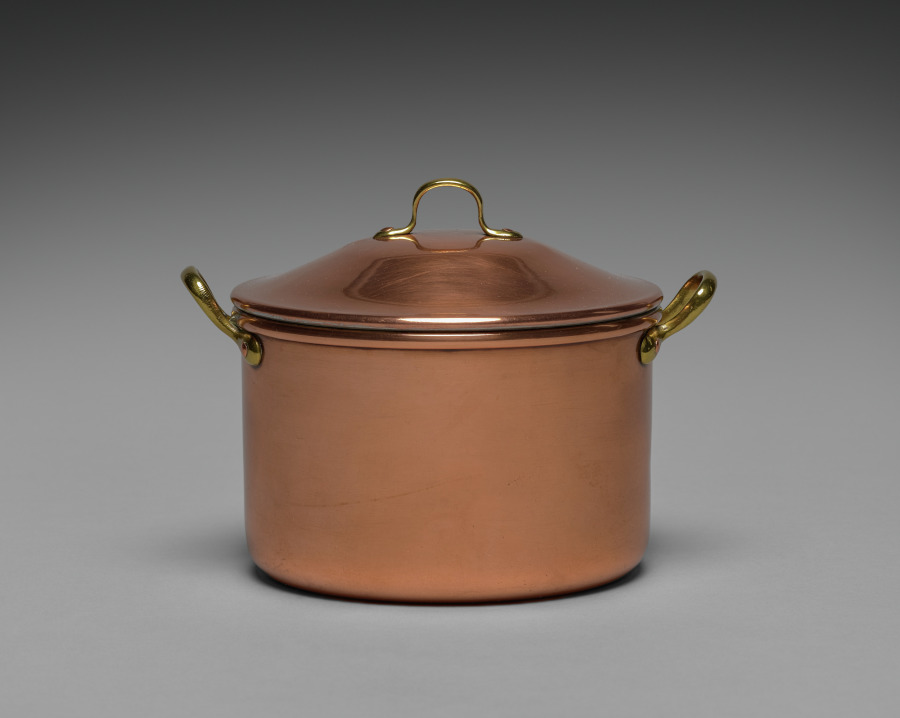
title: Covered Pot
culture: Russia, St. Petersburg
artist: firm of Peter Carl Fabergé (Russian, 1846–1920)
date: 1914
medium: copper with brass handles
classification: Metalwork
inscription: Inscribed: Double-headed eagle; C.FABERGE (in Cyrillic); War (in Cyrillic), 1914r.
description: As Russia entered the First World War, austerity and economy settled into the fabric of life even among wealthy aristocrats and nobility. Not only were precious materials such as gold, silver, and gemstones hard to procure, but such luxury seemed out of place when so many men were dying at the front. Fabergé contributed to the war effort by making shells, casings, and other munitions out of brass and copper. He also made cookware, such as this small soup pot, to be sent to the front lines with provisions tucked inside. However, these simple forms only looked affordable. They were still a luxury only the wealthiest families could afford to send to their sons.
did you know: This copper soup pot was sent to the front lines filled with provisions during the First World War.